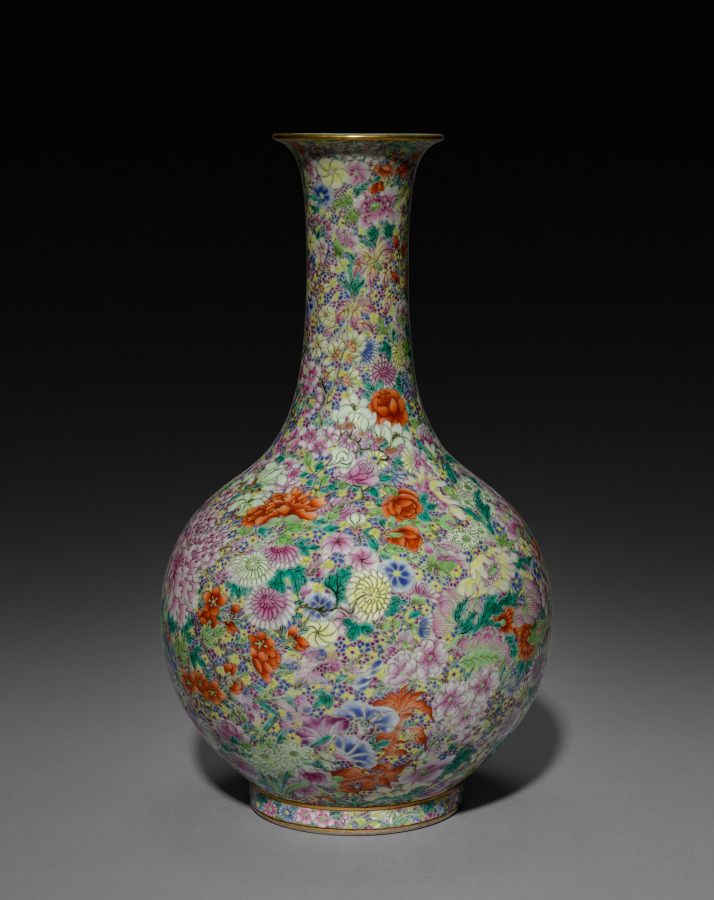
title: Bottle-Shaped Vase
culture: China, Qing dynasty (1644–1911), Jiaqing reign (1796–1820)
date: 1796–1820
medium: Porcelain, overglaze colors and gold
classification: Ceramic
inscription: 大清嘉慶年制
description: This vase is densely decorated with peonies, morning glories, lilies, and lotuses. Purple, yellow, and blue petals fill the surface, forming a continuous millefleur (thousand-flower) pattern. Each petal is delicately shaded to suggest volume and depth, creating a vivid yet orderly composition. The mouth is painted with gold pigment to imitate metal, evoking the appearance of copper-body-painted enamel as seen in Qing dynasty court art. Qing palace records indicate that vases with such patterns were used in everyday flower-viewing displays. In late Qing inventories, comparable examples were listed as furnishings for the emperor and his consorts.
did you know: Porcelain with this dense floral millefleurs decoration and a multitude of overglaze enamel colors was first made in the Qing dynasty and remained popular into the late 1800s.